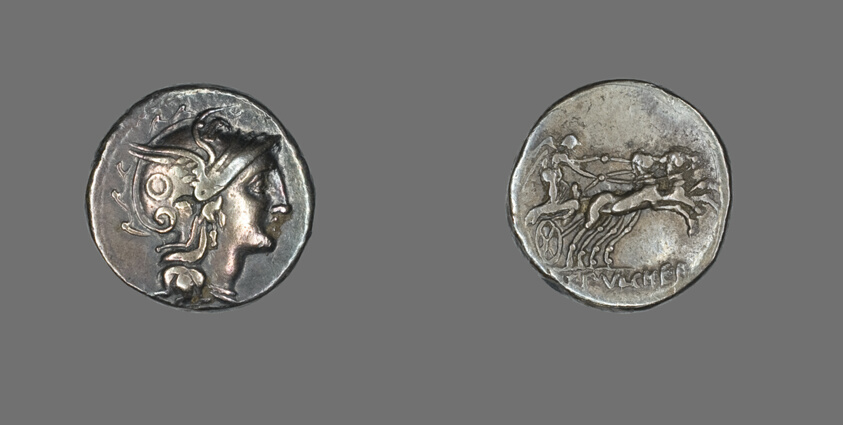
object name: Coin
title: Denarius (Coin) Depicting the Goddess Roma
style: roman (ancient, style or period), ancient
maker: Roman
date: 110-109 BCE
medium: Silver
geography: Roman Empire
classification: coin; ancient art